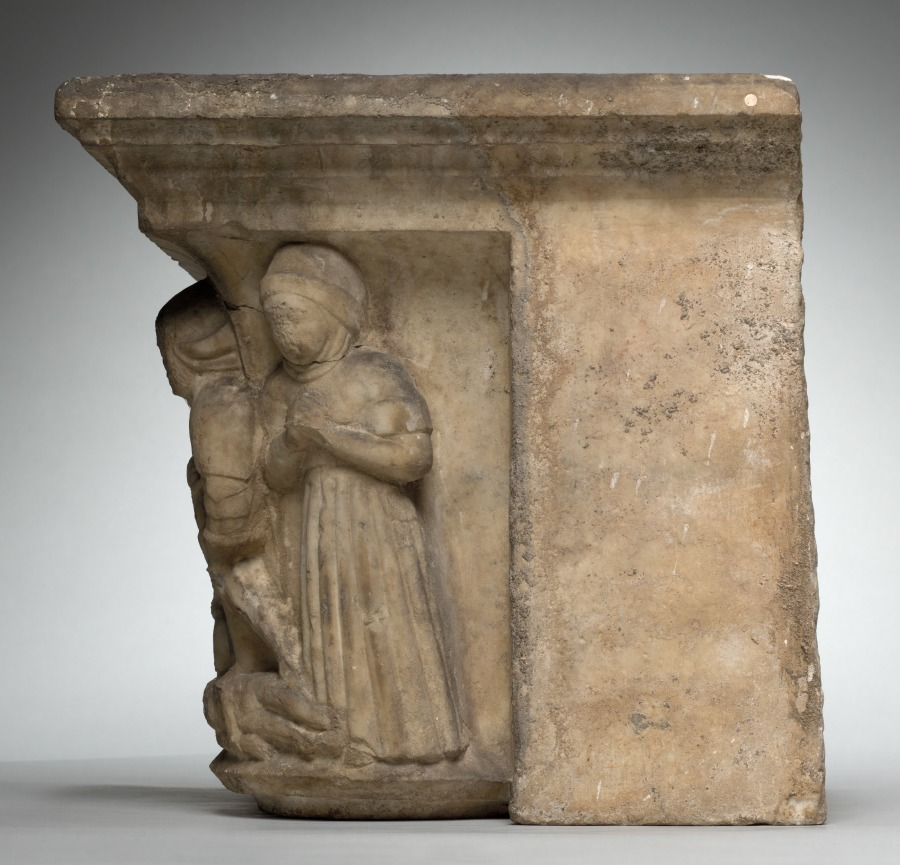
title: Engaged Capital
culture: Southern France, Abbey of Larreule, near Tarbes, 15th century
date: 1400s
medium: limestone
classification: Sculpture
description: This capital belongs to a surviving group including other architectural fragments that once decorated the cloister of the Abbey of Larreule. A cloister was a covered walkway or arcade, usually around all four sides of a square area of grass (the "cloister garth"). The seclusion of the cloister was the monks’ exclusive domain, off limits to others. Here, the monks were supposed to pray, study, meditate, and exercise in privacy and solitude. Such cloister capitals served both to instruct the monks and as a focus for their devotions. Other capitals in this series are installed in the Jardin Massey at Tarbes, near the original abbey. An arch from Larreule has been assembled with other associated French capitals at The Cloisters in New York.